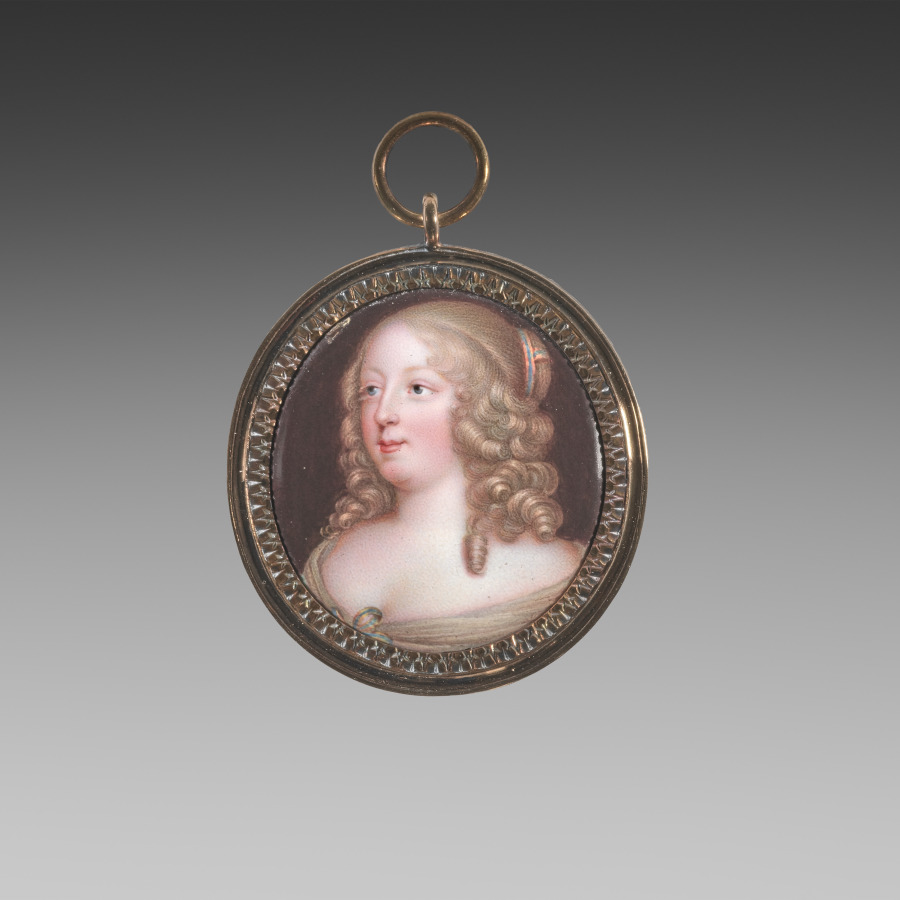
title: Portrait of a Woman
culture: France, 17th century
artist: Jean Petitot (Swiss, 1607–1691)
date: c. 1670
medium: enamel in a silver gilt frame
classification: Portrait Miniature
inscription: inscribed on back of frame: "La Duchess de Chatillon by Petitot from the Hawkins Sale 1904"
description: Unlike fragile portrait miniatures painted in watercolor on vellum or ivory, which are prone to cracking, fading, and flaking, enamels are resilient, impervious to the effects of light, and retain their striking original colors over time. Partly for this reason enamel was considered ideal for reproducing famous paintings and treasured portraits in a reduced and luminous form. The complicated and labor-intensive process of enameling required the artist to fire numerous layers of colored metal oxide at different temperatures, which made it difficult to produce a faithful portrait likeness, though masters of the medium were able create portraits of remarkable subtlety imbued with the sitter's personality. The heyday of enamel painting was the late 1600s and early 1700s. Among the enamel specialists was Petitot, who was patronized by King Charles I of England, King Louis XIV of France, and King John III Sobieski of Poland.